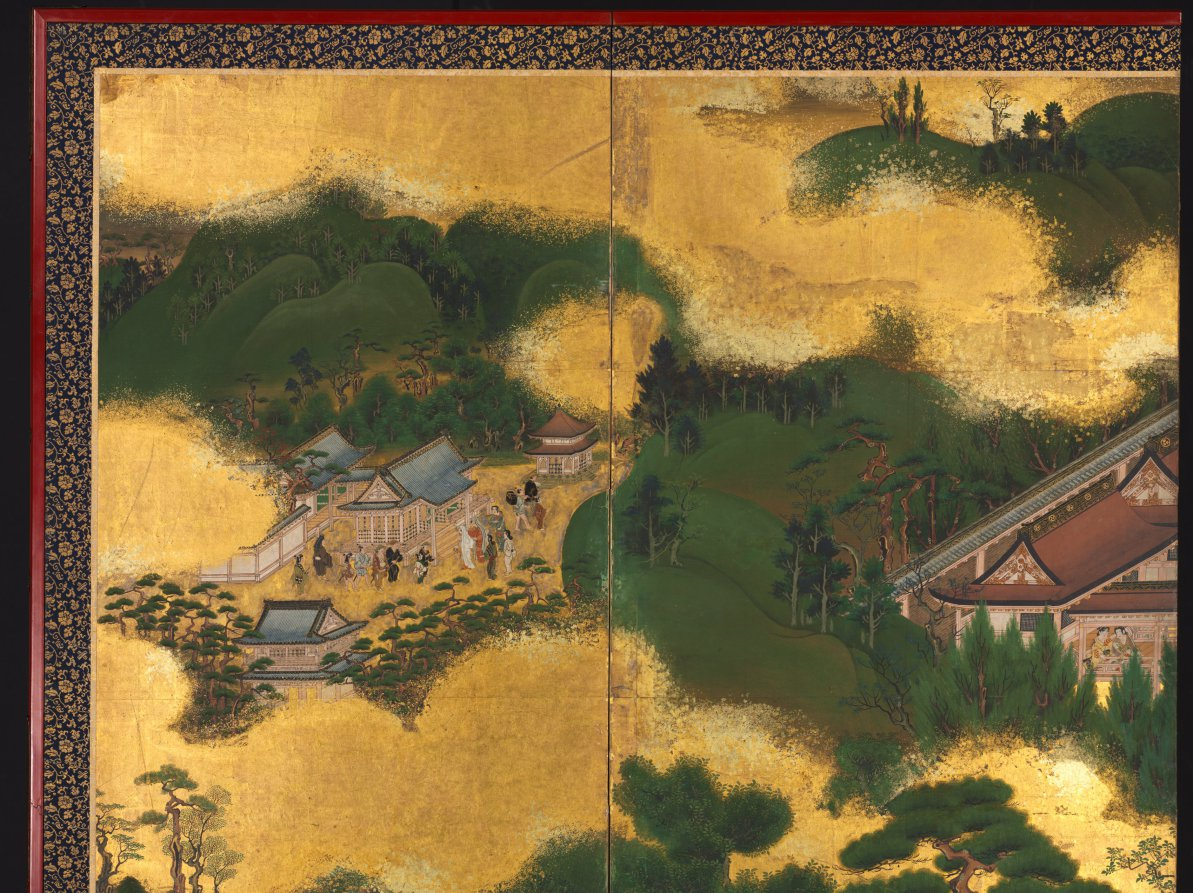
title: Horse Race at the Kamo Shrine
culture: Japan, Edo period (1615–1868)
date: early to mid-1600s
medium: One of a pair of six-panel folding screens; ink and color on gilded paper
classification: Painting